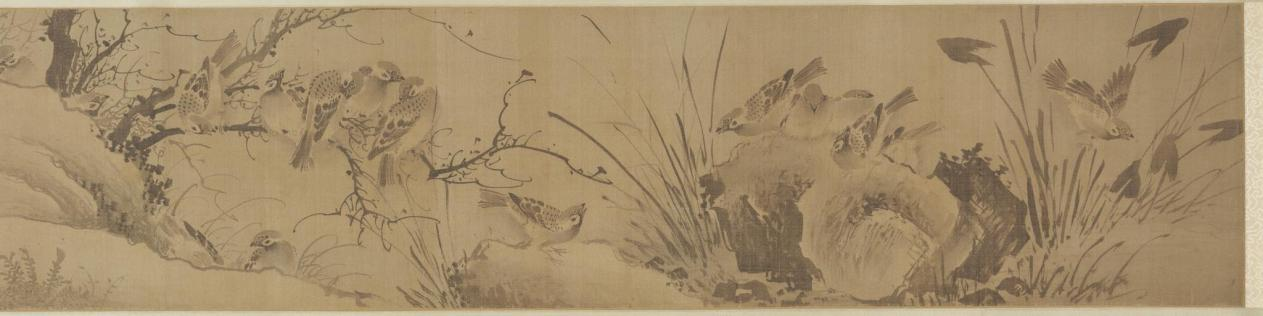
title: A Hundred Sparrows in a Lofty Grove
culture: China, Ming dynasty (1368–1644)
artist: attributed to Lin Liang (Chinese, 1416–1480)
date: 1368–1644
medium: handscroll; ink on silk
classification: Painting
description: Sparrows engaged in all kinds of activities frolic amid leafy branches, blades of grass, rocks, and a waterfall. As our eyes move over the scroll, the artist engages us in enjoying the sparrows’ carefree movements in a natural setting. The charming birds were painted from close observation in swift and fluent brushstrokes. Sparrows are a common bird and in Chinese painting they often represent the commoner in human society as opposed to the noble pheasant or peacock representative of the ruling class.